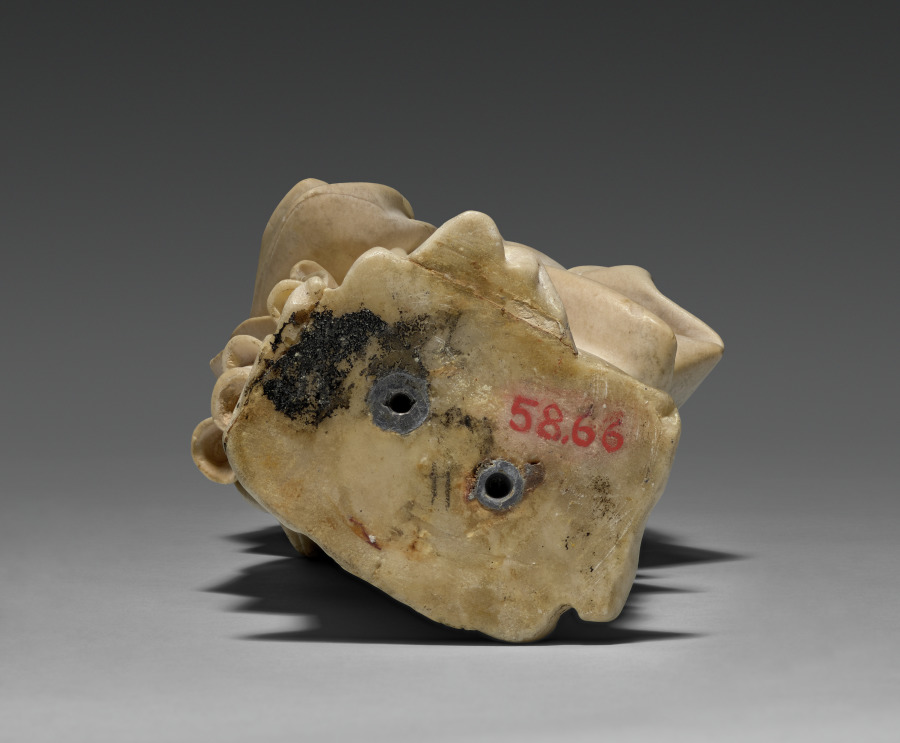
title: Mourner from the Tomb of Philip the Bold, Duke of Burgundy (1364–1404)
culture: Netherlands, active Dijon, 15th century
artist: Claus de Werve (Netherlandish, 1380–1439)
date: 1404–10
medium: vizille alabaster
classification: Sculpture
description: This figure comes from the tomb of Duke Philip the Bold from the church of Champmol near Dijon (Burgundy, France). Philip, who founded the monastery and designated it as his burial place, hired the best artists, many of whom came from the Netherlands. While the commission was given in 1381, the work was not completed until 1410, six years after the duke’s death. This mourner is unusual for the time because it is not carved as a static low relief on the pedestal of the tomb but interacts with the viewers and their fellow procession members. The lifelike quality of the figure is due in large part to the alabaster. Its softness allowed artists to carve details into the material, and the transparent, milky white stone could also be polished to a high gloss.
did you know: A plaster cast of this mourner decorates the empty niche in the Tomb of Philip the Bold in Dijon, France.